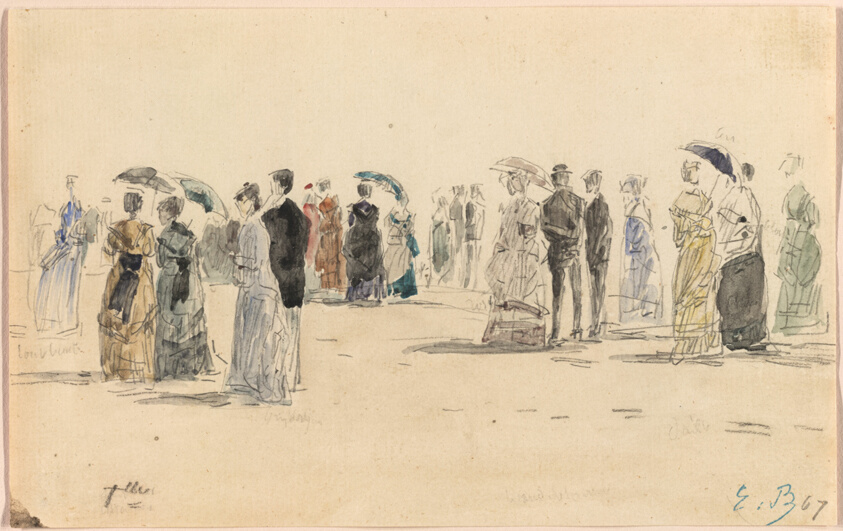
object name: Drawing and Watercolor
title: People on the Beach at Trouville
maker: Eugène Louis Boudin (French, 1824–1898)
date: 1864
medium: Watercolor and graphite on ivory laid paper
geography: France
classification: prints and drawing; watercolor; drawings (visual works)